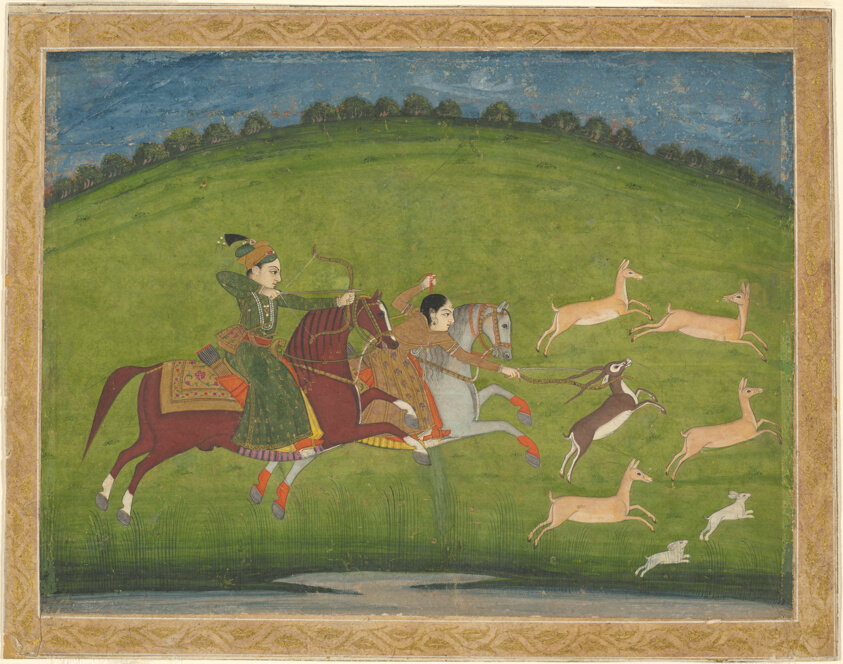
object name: Painting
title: Prince and Princess Hunting Blackbuck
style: mughal, Indian (South Asian), South Asian, asian, Islamic (culture or style)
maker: India; West Bengal, Murshidabad or Avadh/Uttar Pradesh, Lucknow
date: Mid–18th century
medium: Opaque watercolor and gold on paper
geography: Lucknow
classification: watercolor; painting; asian art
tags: animals